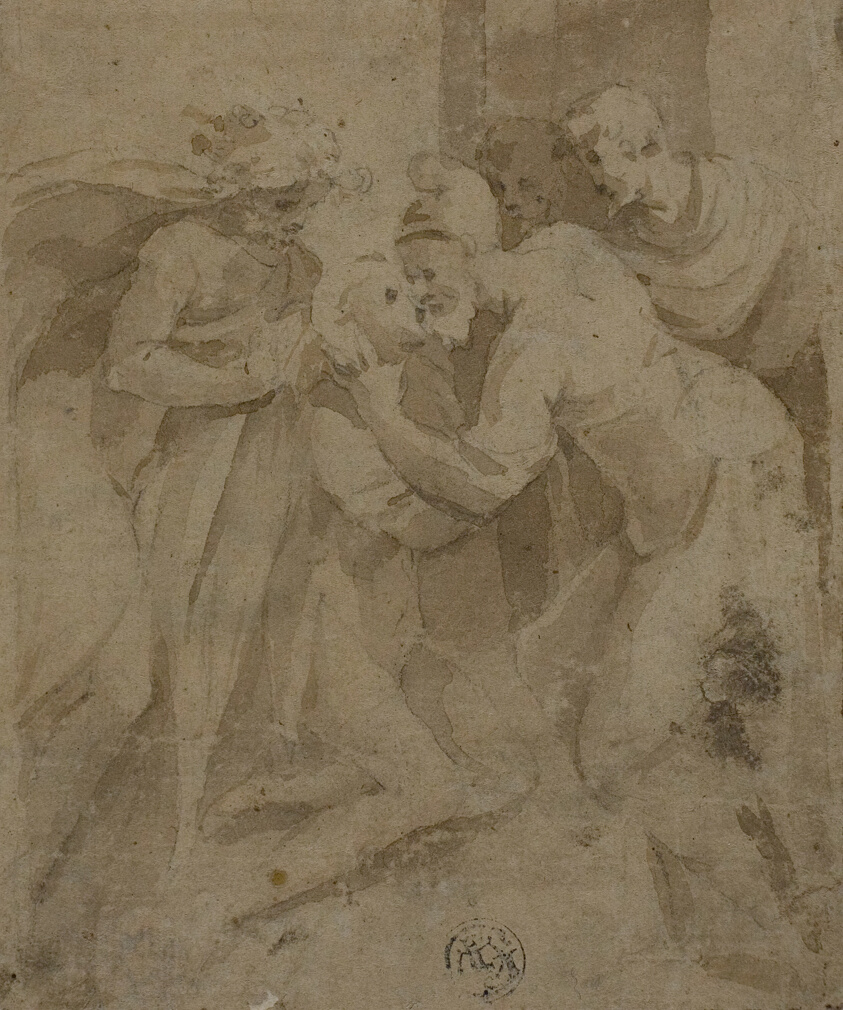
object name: Drawing and Watercolor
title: Return of the Prodigal Son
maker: Attributed to Andrea Meldolla, called Schiavone; Italian, c. 1510-1563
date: 1536/40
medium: Brush and brown wash, over black chalk, on tan laid paper, laid down on ivory laid paper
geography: Italy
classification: wash; drawings (visual works); prints and drawing